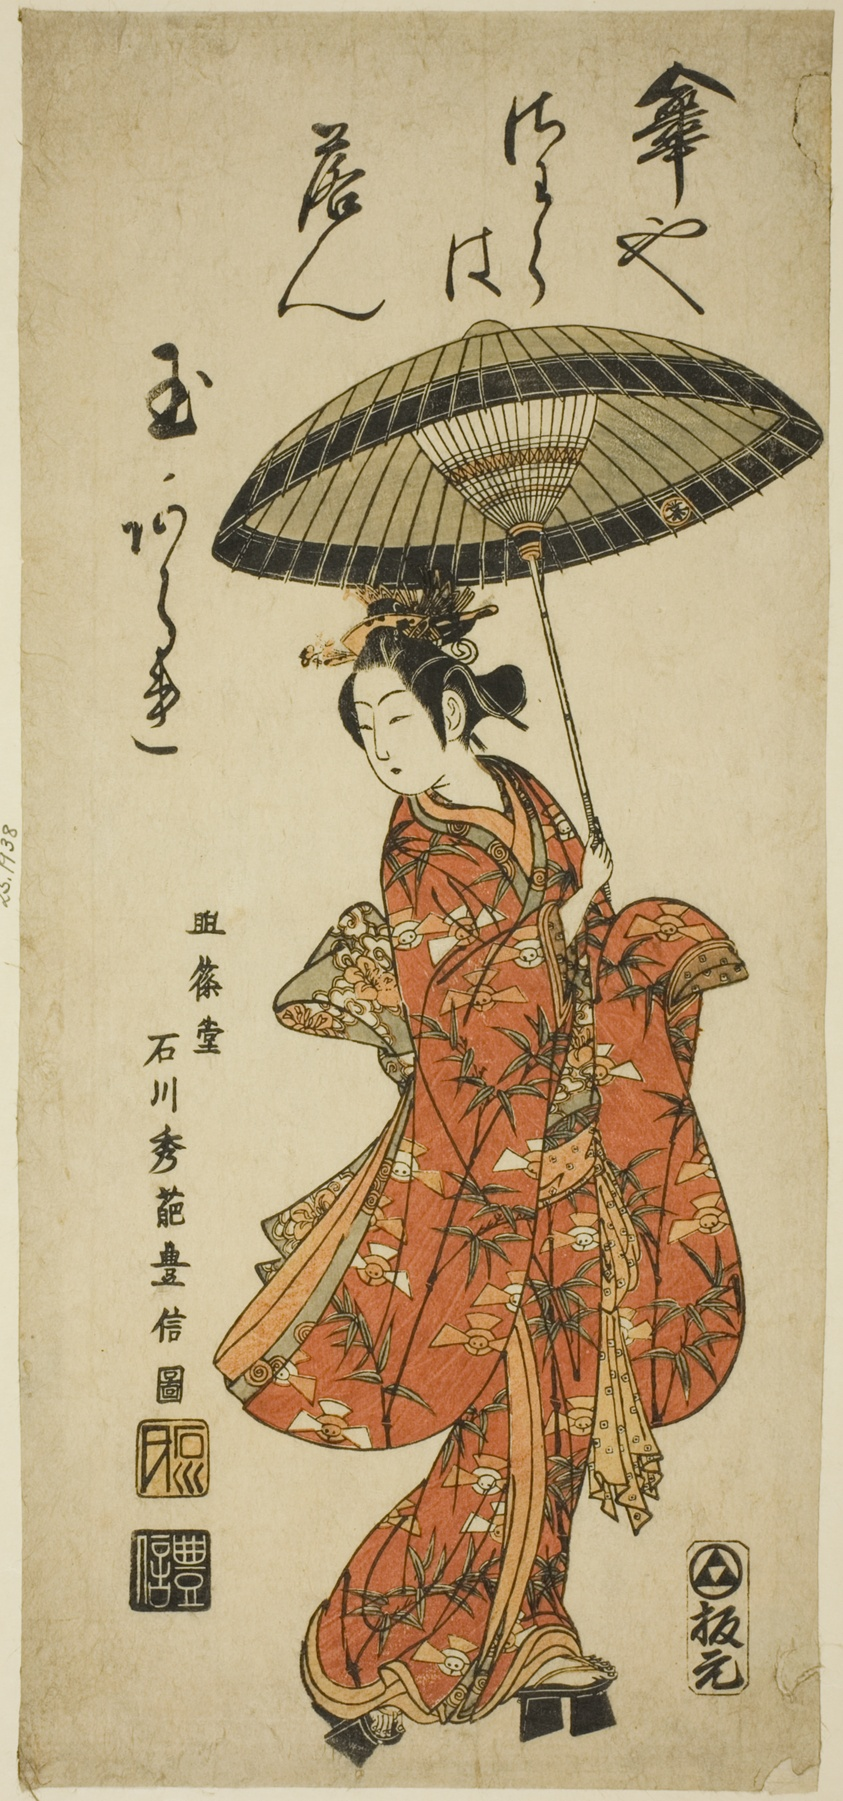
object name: Print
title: The Actor Segawa Kikunojo II holding an umbrella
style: Japanese (culture or style)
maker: Ishikawa Toyonobu (Japanese, 1711-1785)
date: c. 1750s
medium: Color woodblock print; o-hosoban, benizuri-e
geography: Japan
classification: woodblock print; print; asian art